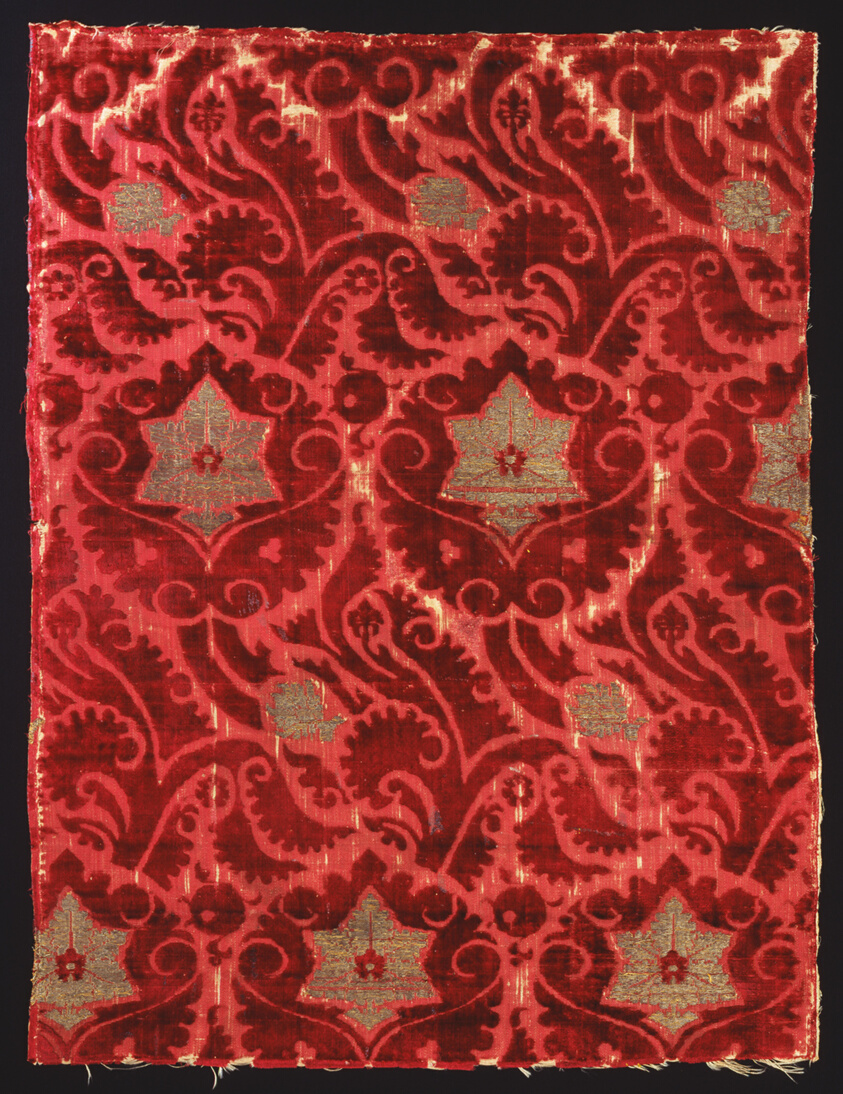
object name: Textile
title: Fragment of Velvet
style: 15th century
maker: Probably Florence, Italy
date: 1401–50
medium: Silk and gilt-metal-strip-wrapped silk, warp-float faced 4:1 satin weave with supplementary brocading wefts bound by main warps in weft-float faced 1:2 'Z' twill interlacings and with supplementary pile warps forming cut voided velvet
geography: Italy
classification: textile; weaving - velvet